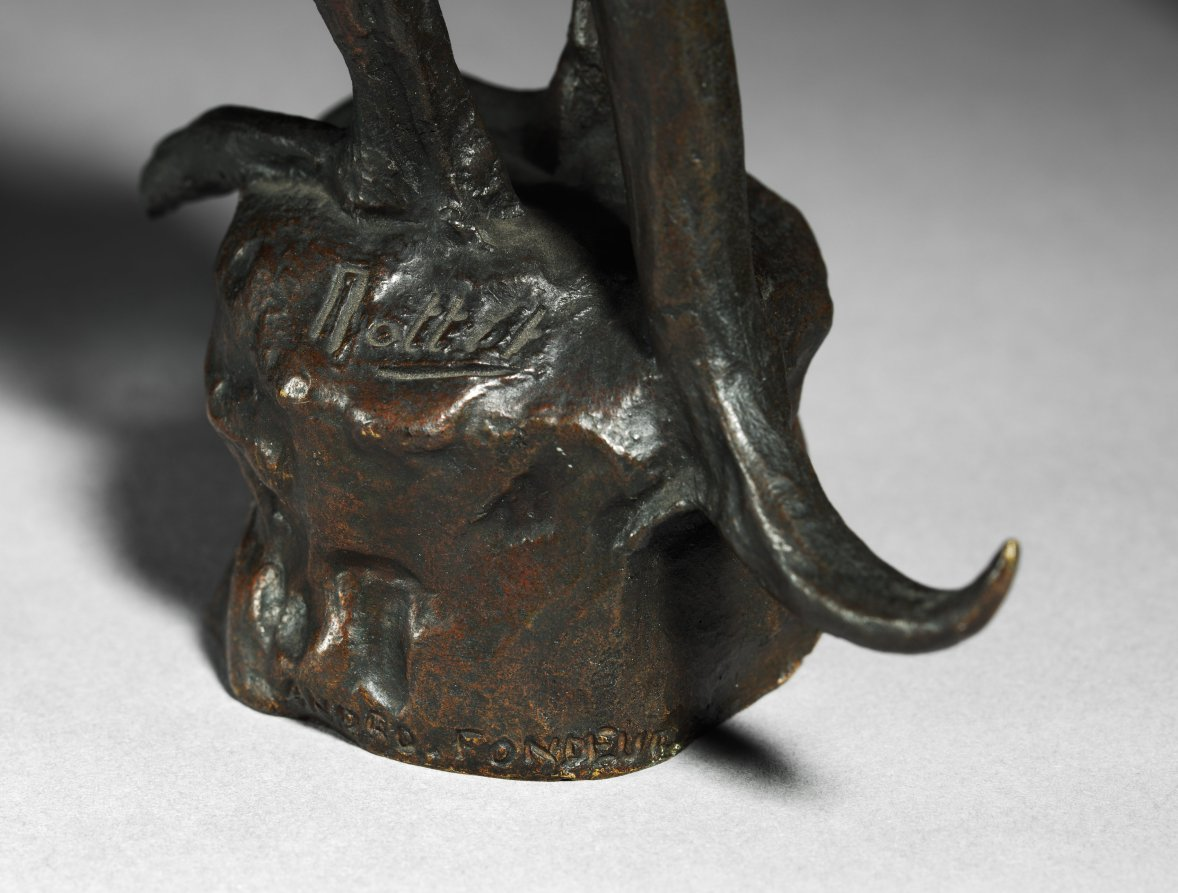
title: Kangaroo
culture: France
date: c. 1900–1925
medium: bronze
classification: Sculpture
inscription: Signed Nottot (?); ANDRO. FONDEUR, lower base